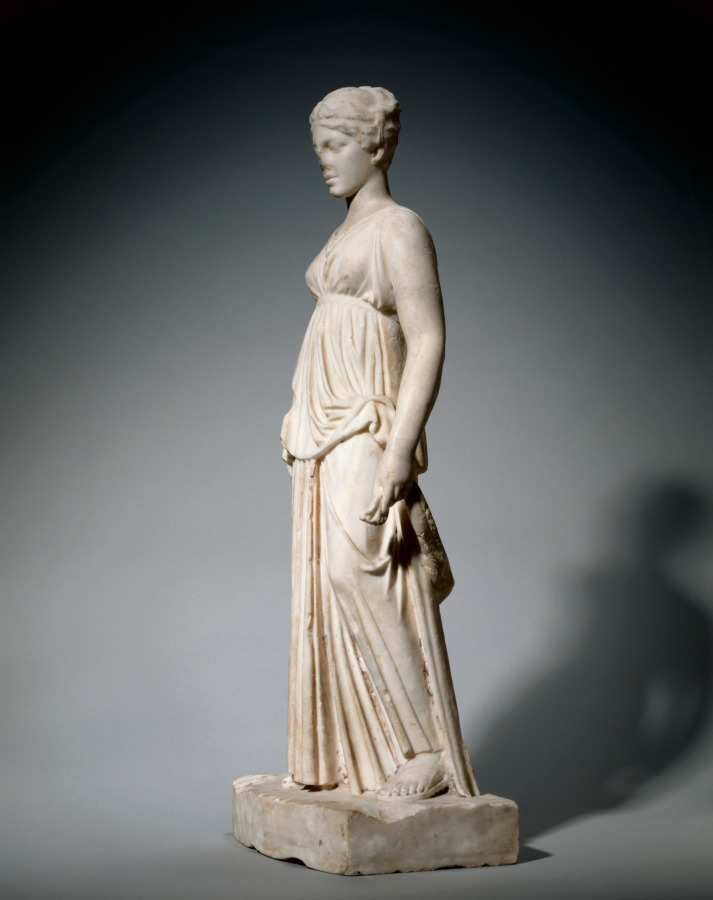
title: Dancer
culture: Greece, Alexandria(?)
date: c. 50 BCE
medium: marble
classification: Sculpture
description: The pose and dress of this statuette of a woman, together with her elaborate sandals and hairstyle, suggest that she represents a dancer. Standing with one knee slightly bent, she holds a sash in her lowered left hand. The sash passes behind her back, probably to be held aloft in her right hand, now separated. She wears a chiton, a rectangular sheet folded at the top to create a large overhang, then wrapped around the left side of the body and pinned at the shoulders. Belted high above her waist, the fabric cascades in deep folds.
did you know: Three nonjoining fragments, including a right hand and arm, may belong to this statuette.